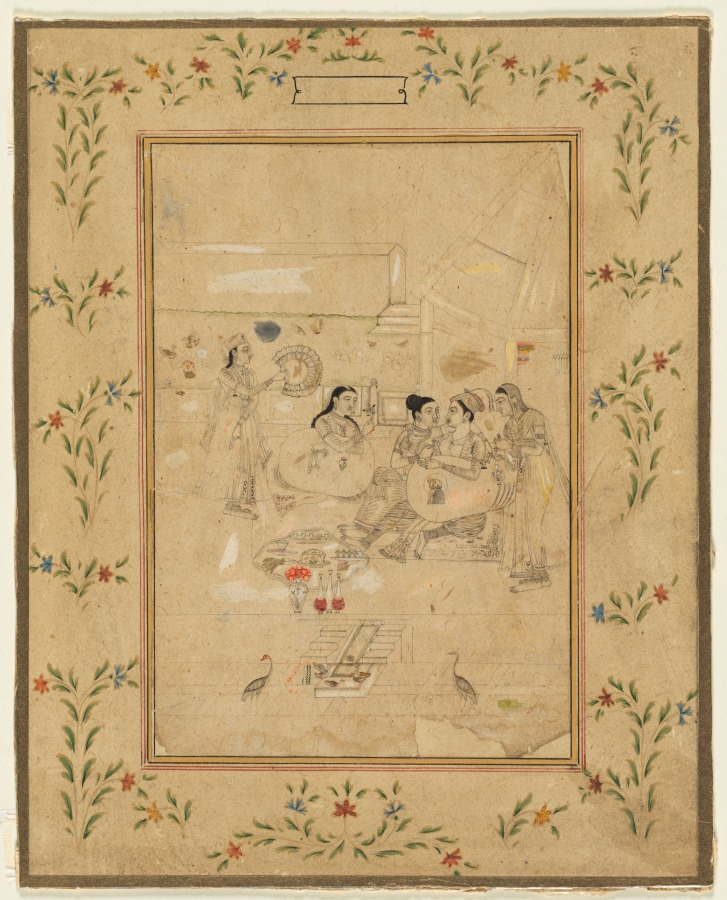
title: Women playing at cross-dressing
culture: India, Golconda, Deccan, 17th century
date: c. 1680–1700; border added 1800s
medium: ink heightened with colors on paper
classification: Painting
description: In this scene harem women act out the visit of a prince. One of them has donned a man’s royal feathered turban, and a lady affectionately offers a cup of wine as attendants stand by with two more bottles, a fan, and a rose. The master artist of an Indian painting workshop would draw the composition and make visual notations as to which colors and patterns should be used. The drawing would then be given to a colorist to paint, with final details rendered by another artist or the initial master.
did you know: Heavy eyelids give a languorous quality to paintings made in Golconda.